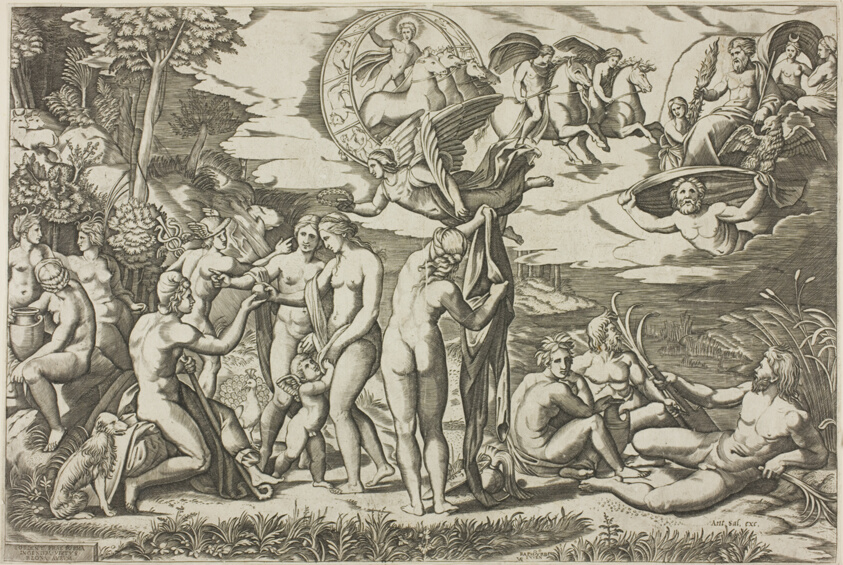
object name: Print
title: The Judgment of Paris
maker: Printed by Antonio Salamanca (Italian, 1478-1562); by or after Marcantonio (Italian c. 1480-1534); after Raffaello Sanzio, called Raphael (Italian, 1483-1520)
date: c. 1520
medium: Engraving in black on ivory laid paper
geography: Italy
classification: engraving; print; prints and drawing